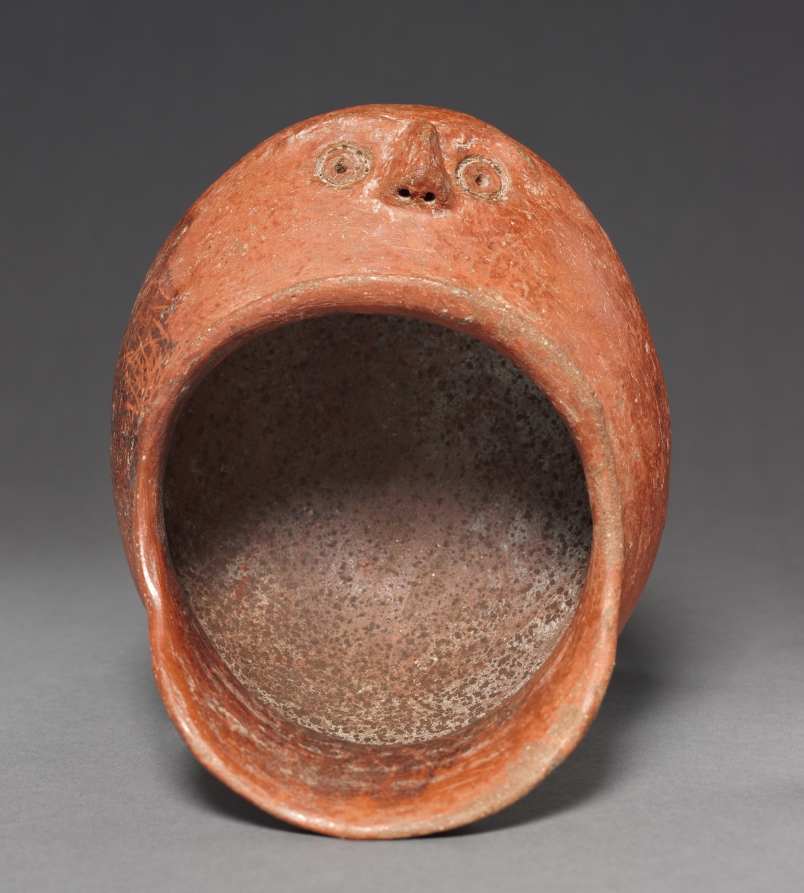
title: Head Effigy Bowl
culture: Mexico, Region of Tilantongo, District of Tlaxiaco, Nayarit style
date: 100 BCE–300 CE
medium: pottery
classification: Ceramic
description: After about 200 BC, West Mexican chieftains gained in authority, their new status reflected in shaft tombs that shelter not only their remains but also lavish offerings, including sculptural ceramics. Many of the ceramics may refer to the crucial activities of a chief’s life, such as marriage, feasting, and war. The meaning of this unusual bowl—a head whose gaping mouth serves as the aperture—is unknown.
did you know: Ancient Nayarit art is celebrated for its timeless, often lighthearted expressions of humanity.